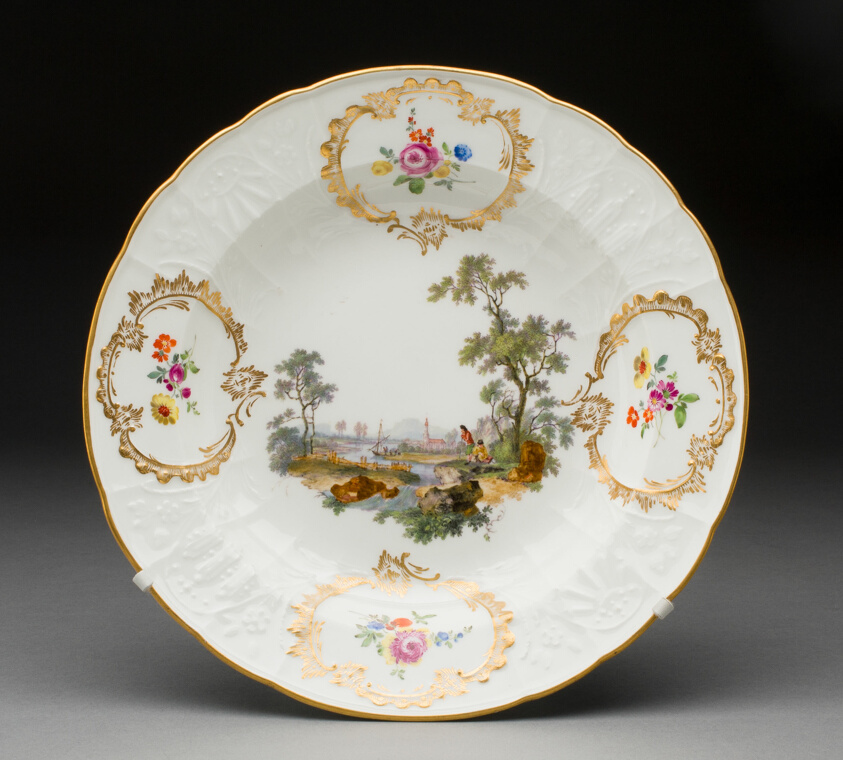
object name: Ceramics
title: Soup Plate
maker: Meissen Porcelain Manufactory (German, founded 1710)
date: 1763/74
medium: Hard-paste porcelain, polychrome enamels, and gilding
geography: Meissen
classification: plate (general, dish); tableware; dish (vessel); ceramics; porcelain; european decorative arts